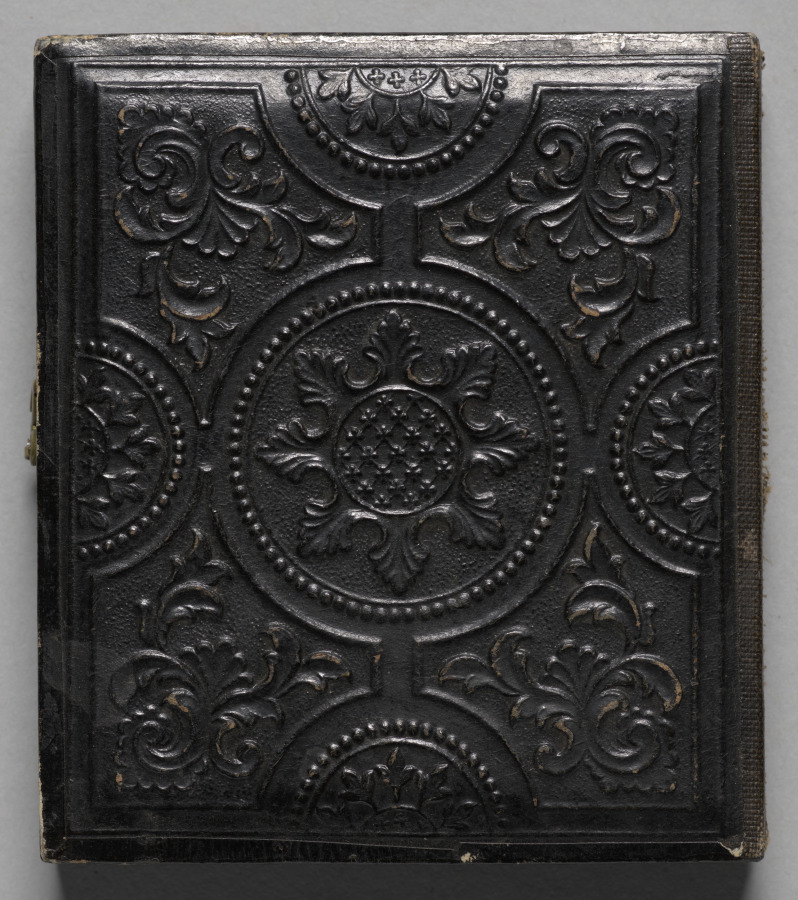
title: Shakespearean Actor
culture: America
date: c. 1858–1862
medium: ambrotype, tinted, sixth plate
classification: Photograph